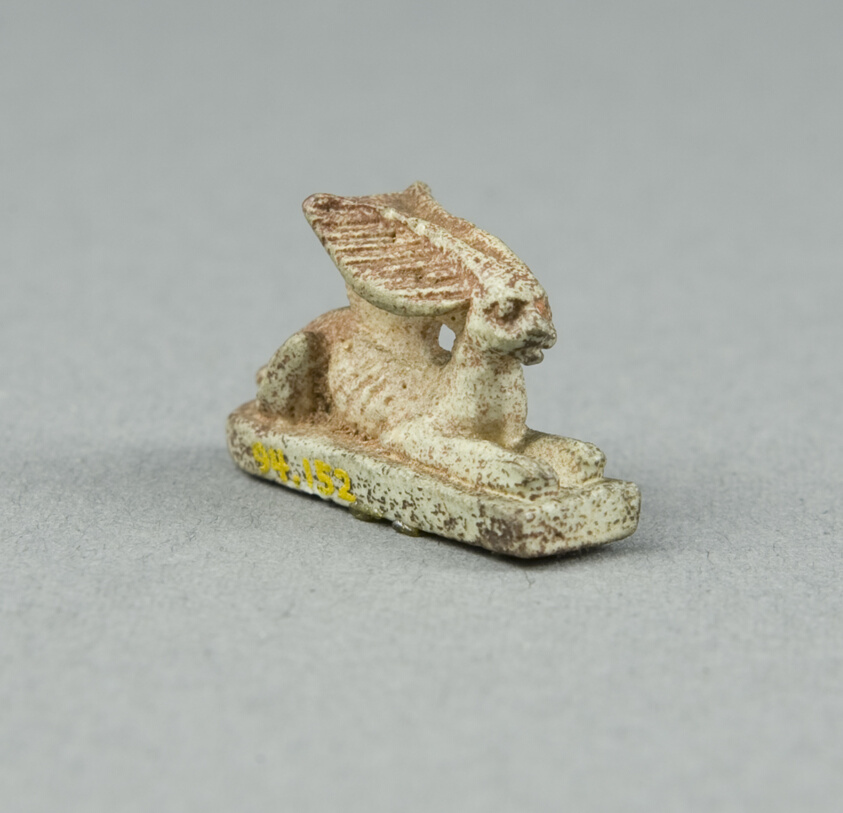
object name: Costume and Accessories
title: Amulet of a Cape Hare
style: late period (egyptian), ancient, egyptian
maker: Egyptian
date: Late Period, Dynasties 26–31 (664–332 BCE)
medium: Faience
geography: Egypt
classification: amulet; jewelry; ceramics; ancient art; costume; faïence (composite material)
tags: hares, animals